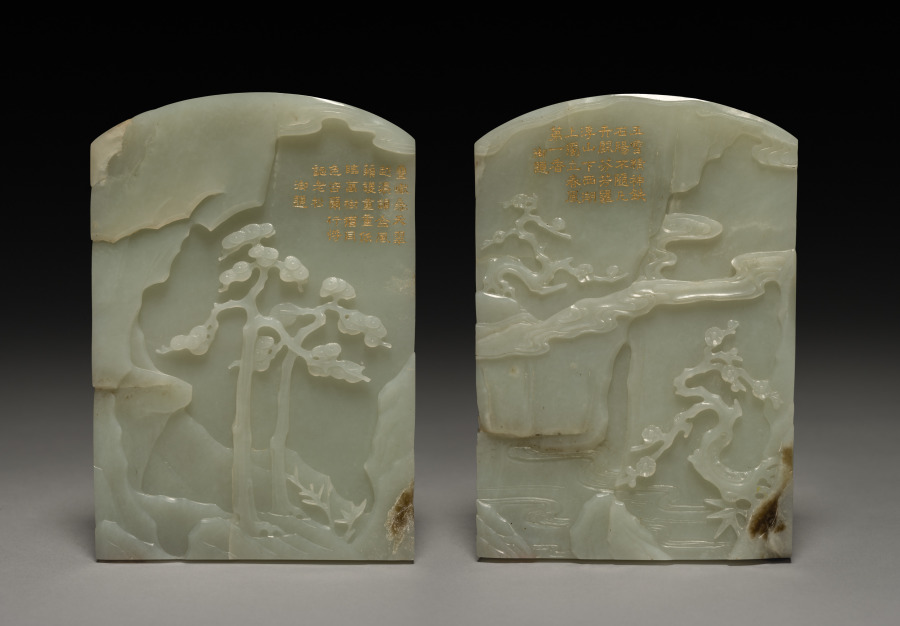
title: Table Screen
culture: China, Qing dynasty (1644–1911), Qianlong reign (1736–95)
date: 1736–95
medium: jade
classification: Jade